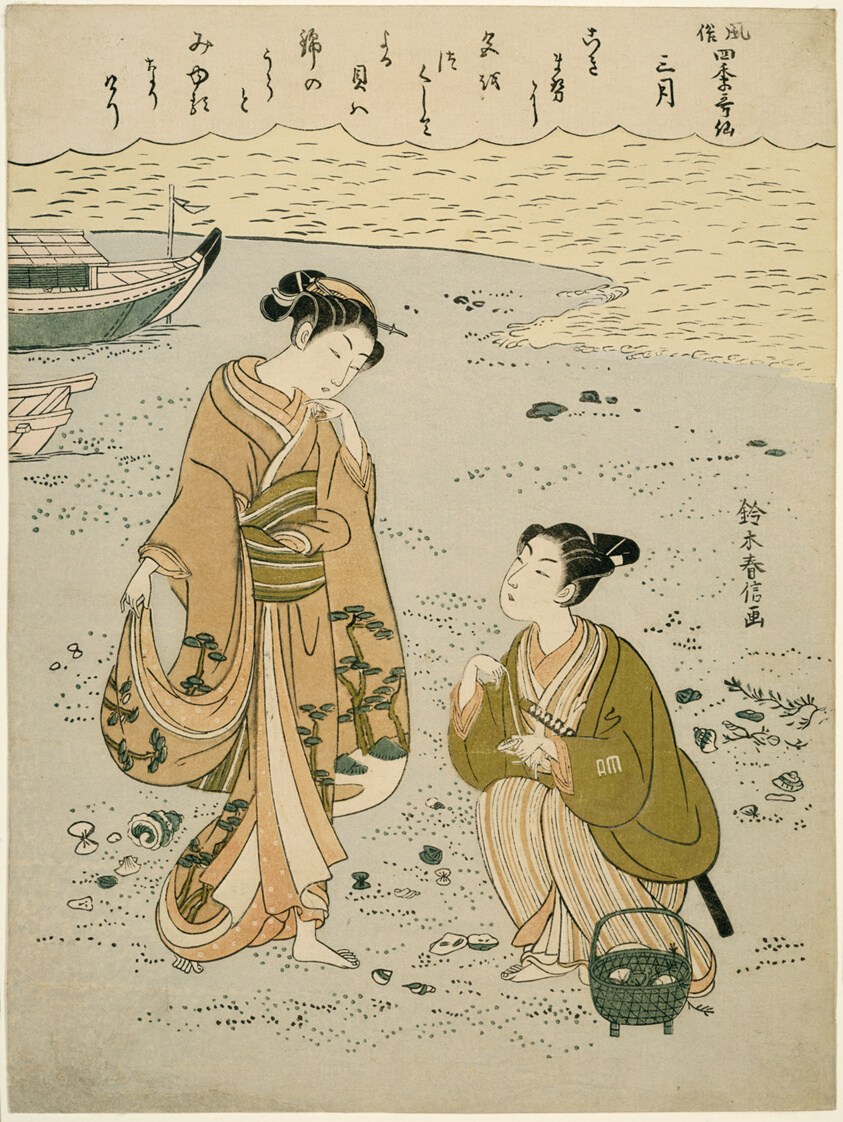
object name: Print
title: The Third Month (Sangatsu), from the series "Popular Versions of Immortal Poets in Four Seasons (Fuzoku shiki kasen)"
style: Japanese (culture or style)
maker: Suzuki Harunobu 鈴木 春信; Japanese, 1725 (?)-1770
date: c. 1768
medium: Color woodblock print; chuban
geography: Japan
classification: woodblock print; print; asian art